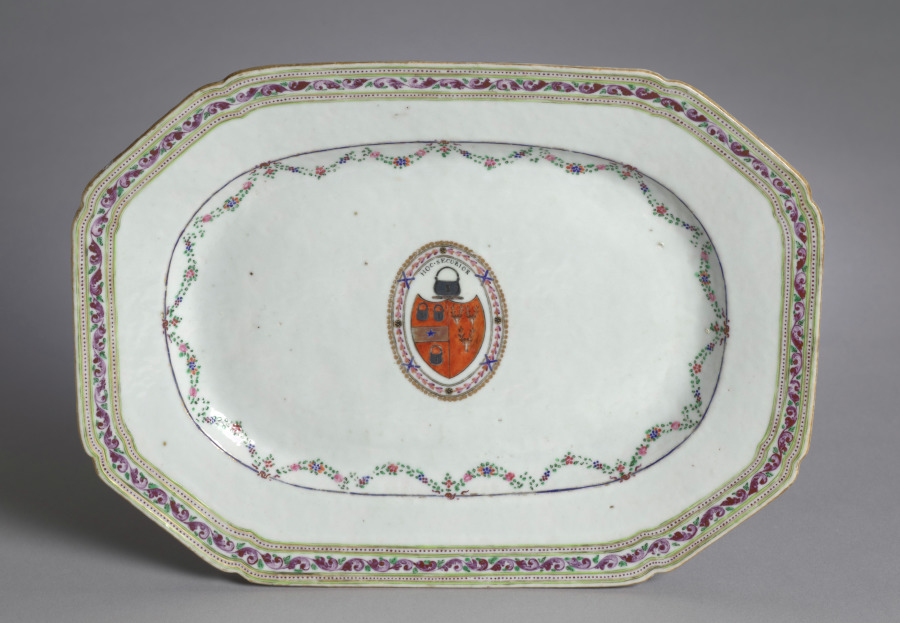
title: Platter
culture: China, Chinese Export, 18th century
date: 1770–85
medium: porcelain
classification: Ceramic